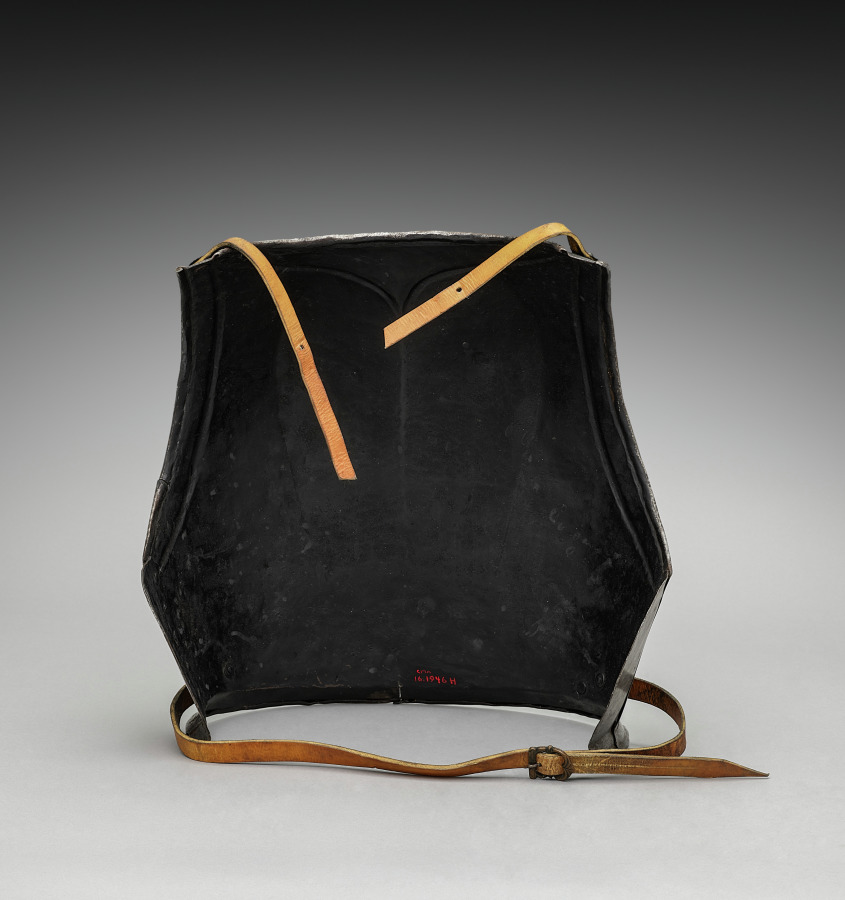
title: Backplate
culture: Germany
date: c.1550–1570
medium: iron, steel, leather and brass rivets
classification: Arms and Armor